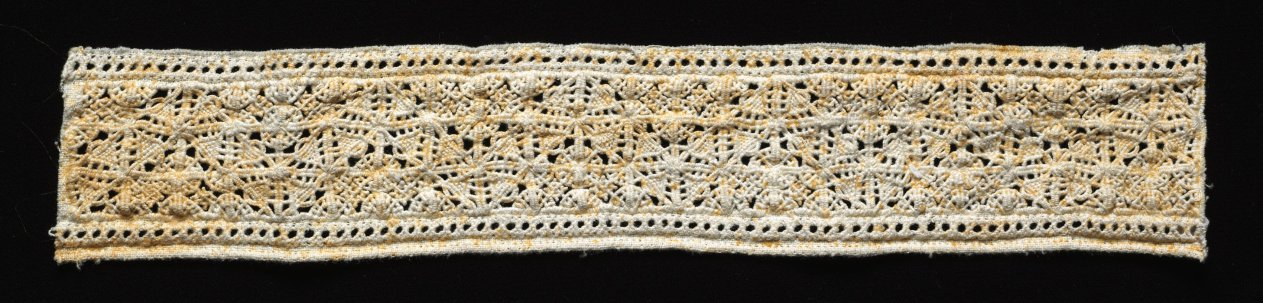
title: Lace Fragment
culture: Italy, Venice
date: 1500s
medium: Linen: needle lace, reticella insertion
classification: Lace